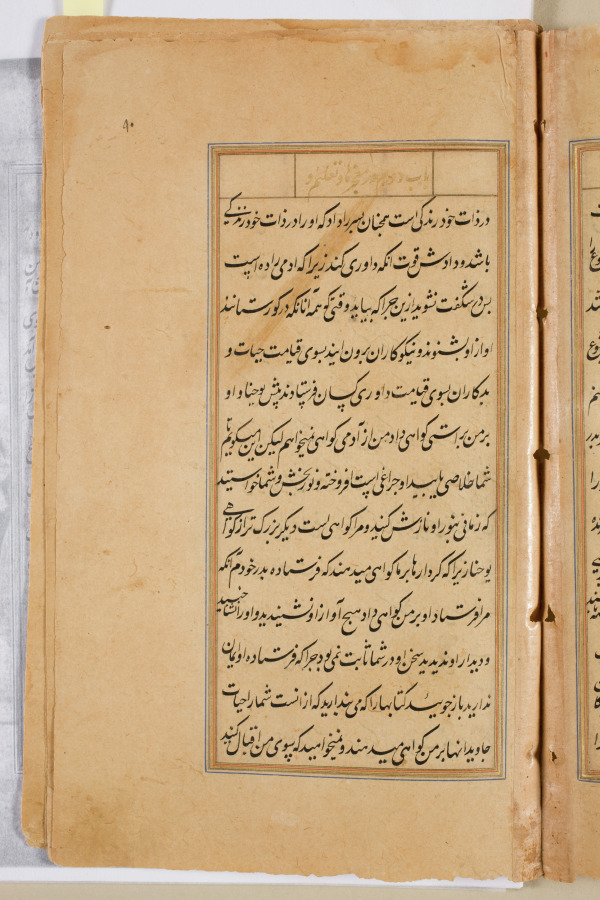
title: Text page from a Mirror of Holiness (Mir’at al-quds) of Father Jerome Xavier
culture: Mughal India, Allahabad, made for Prince Salim (1569–1627)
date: 1602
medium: Ink and gold on paper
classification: Manuscript